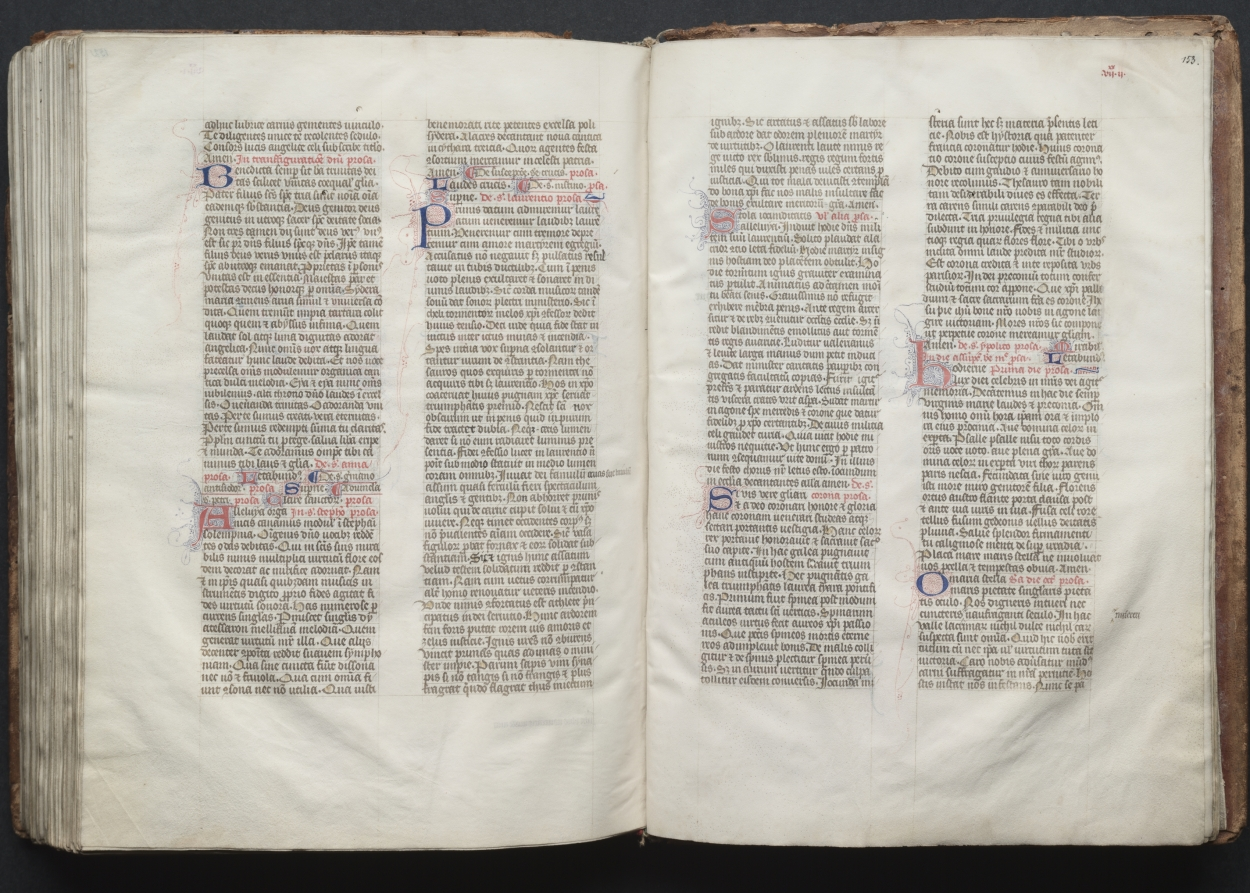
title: The Gotha Missal: Fol. 153r, Text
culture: France, Paris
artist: Master of the Boqueteaux (French)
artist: and Workshop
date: c. 1375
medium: ink, tempera, and gold on vellum; blind-tooled leather binding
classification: Bound Volume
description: The style and quality of this manuscript's decoration is typical of deluxe Parisian books made for aristocratic or royal patrons. Most of the book's decoration appears to be the work of the Master of the Boqueteaux, an artist active at the court of King Charles V (died 1380). His style was apparently shared by a number of book illuminators working in and around Paris. It is very possible that the Gotha Missal belonged to Charles V, but is not provable because the manuscript has no royal portraits and lacks a colophon. Given the book's magnificent decoration, however, it would seem that it was produced for a Valois prince, if not for the king himself. The manuscript receives its name from the German dukes of Gotha, its later owners.